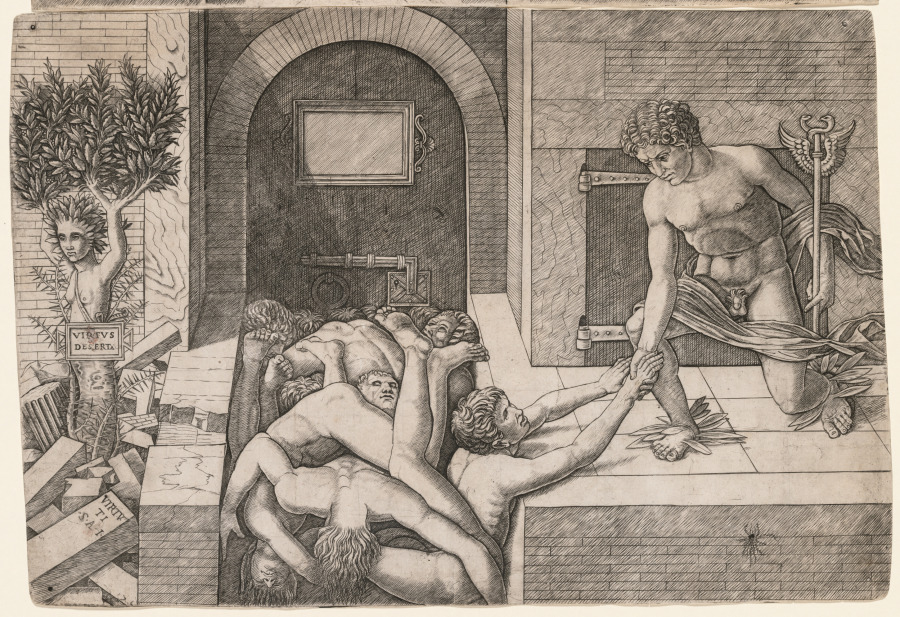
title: Allegory of the Rescue of Humanity: Virtus Deserta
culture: Italy, late 15th-early 16th century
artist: Giovanni Antonio da Brescia (Italian)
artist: after Andrea Mantegna (Italian, about 1431–1506)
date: c. 1500–1505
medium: engraving printed on two sheets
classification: Print